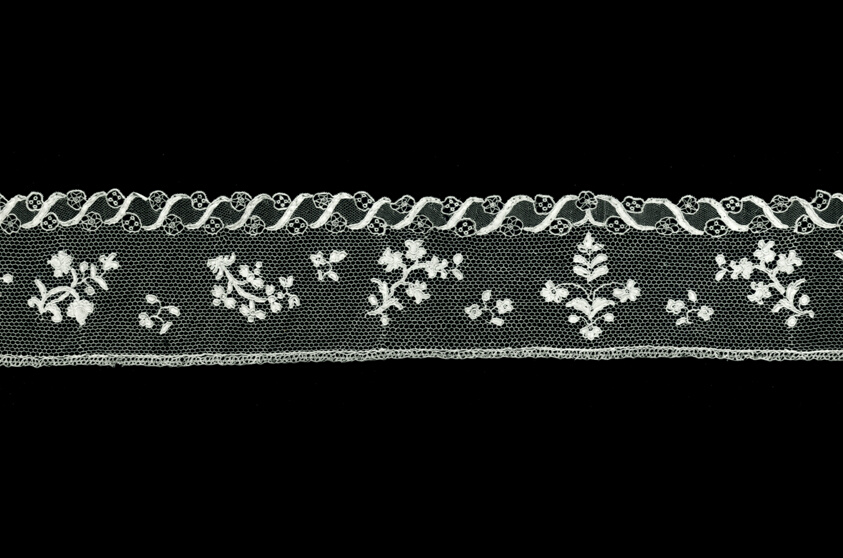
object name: Textile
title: Border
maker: France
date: 1780s/90s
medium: Linen, needle lace of a type known as "Point d'Argentan" with buttonholed mesh ground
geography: France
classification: textile; lace - needle